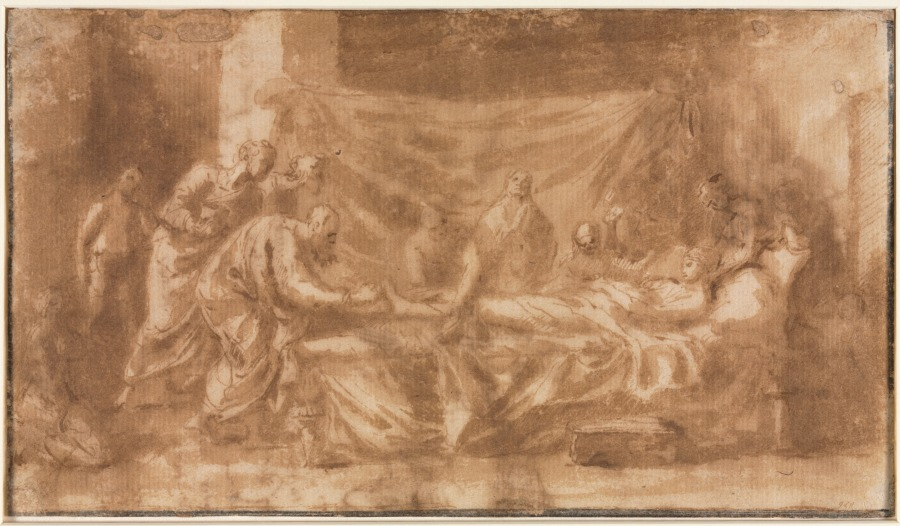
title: Extreme Unction (recto); Three Heads and Other Sketches (verso)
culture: France, 17th century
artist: Nicolas Poussin (French, 1594–1665)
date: 1643–1644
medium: pen and brown ink and brush and brown wash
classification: Drawing